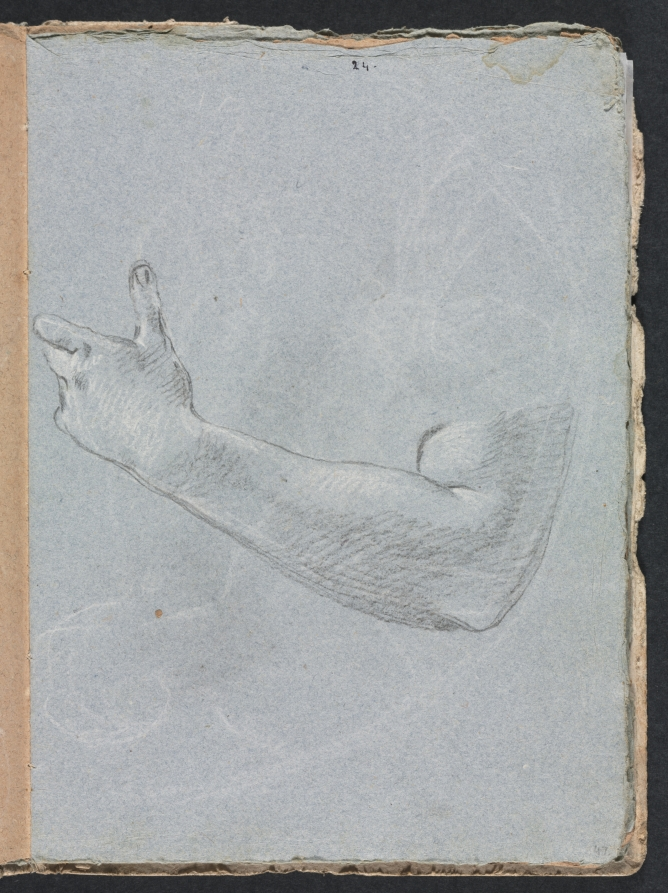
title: Verona Sketchbook: Left arm and hand (page 47)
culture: Italy, 18th century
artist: Francesco Lorenzi (Italian, 1723–1787)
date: 1760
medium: black chalk with white heightening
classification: Bound Volume